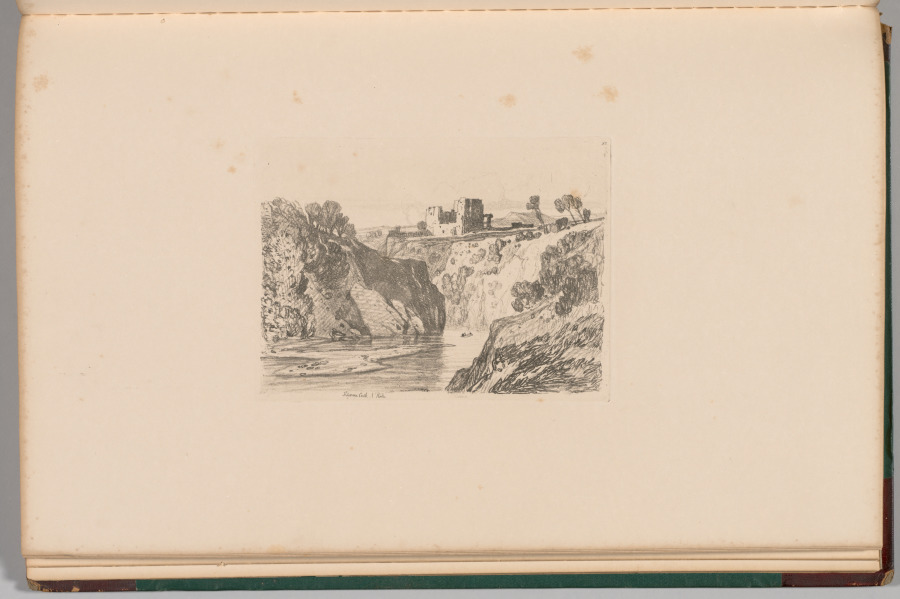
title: Liber Studiorum: Plate 27, Kilgarren Castle, N. Wales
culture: England, 19th century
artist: John Sell Cotman (British, 1782–1842)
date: 1838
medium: softground etching, from a bound volume containing 48 plates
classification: Bound Volume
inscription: In plate, within image, upper right: 27; in plate, below image: Kilgarren Castle, N. Wales. J S Cotman